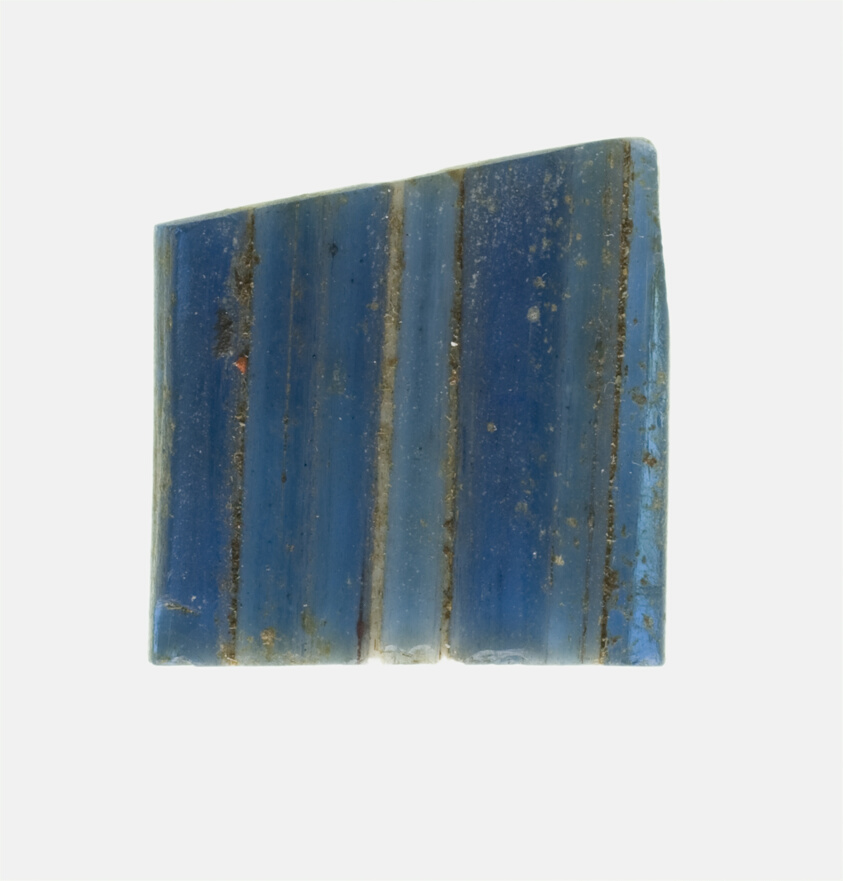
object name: Decorative Arts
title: Fragment of an Inlay with a Zig-zag Pattern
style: roman (ancient, style or period), ancient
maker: Roman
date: 1st century BCE–1st century CE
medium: Glass, mosaic glass technique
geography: Italy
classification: glass; inlay; ancient art; decorative arts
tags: decoration